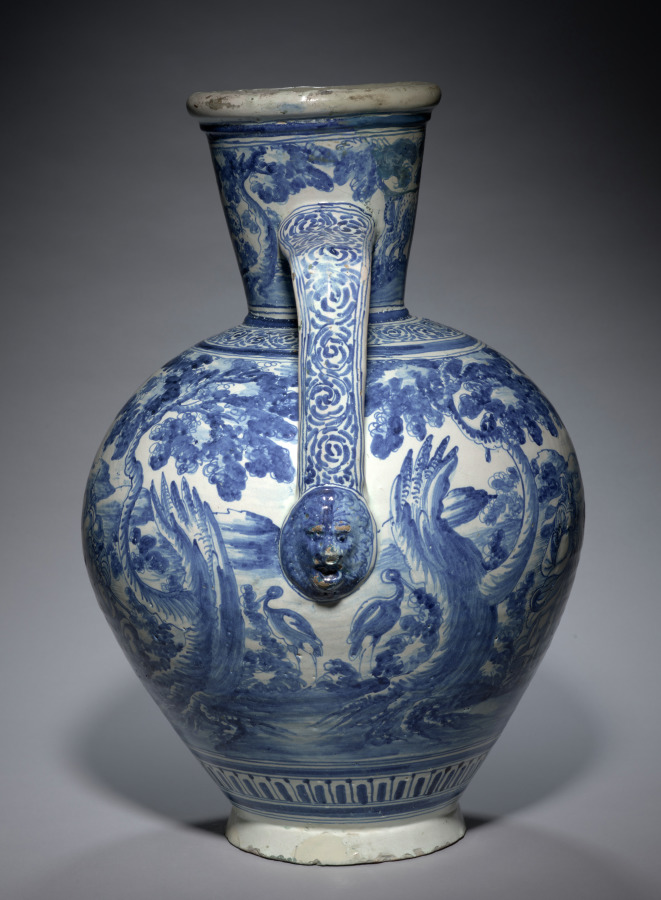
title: Two-Handled Jar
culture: Spain, Talavera, 17th century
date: early 1600s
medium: tin-glazed earthenware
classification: Ceramic